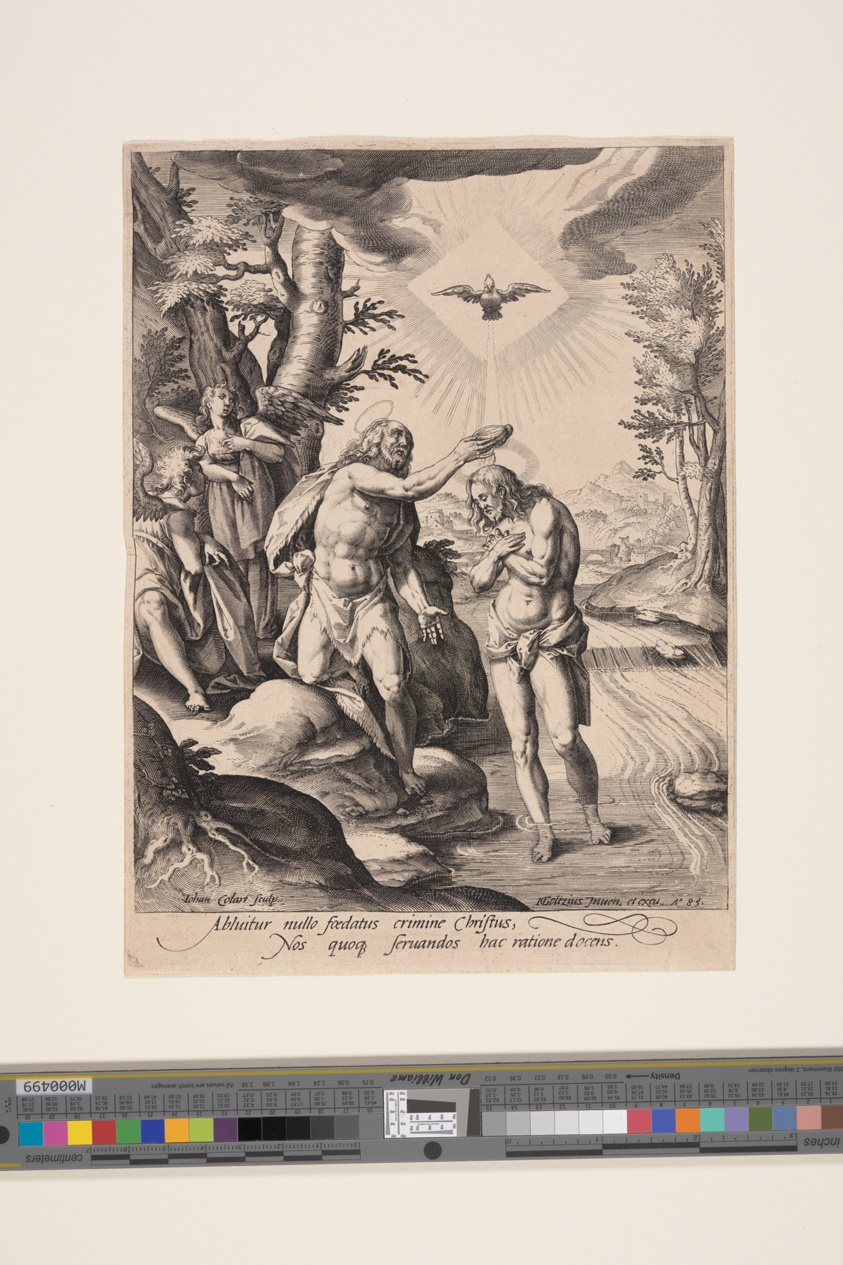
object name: Print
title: The Baptism of Christ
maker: Jan Collaert II (Flemish, c. 1561-c. 1620); after Hendrick Goltzius (Dutch, 1558–1617)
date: 1585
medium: Engraving on laid paper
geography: Flanders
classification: engraving; paper; print; prints and drawing